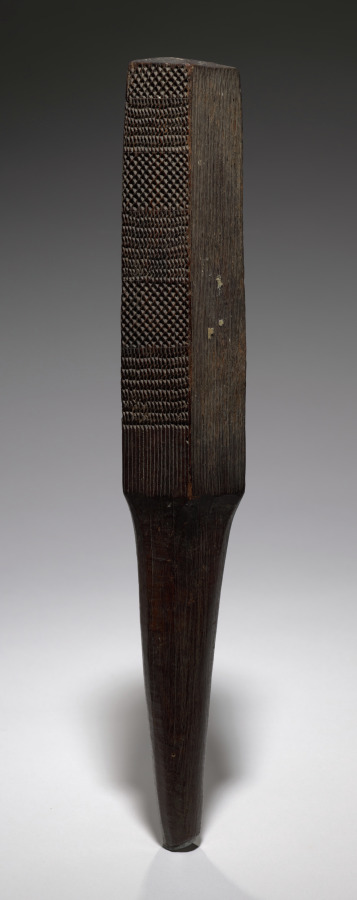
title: Tapa Cloth Beater (l'e kuku)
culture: Polynesia, Hawaii, 20th century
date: before 1930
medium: wood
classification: Sculpture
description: To make tapa, a decorated bark cloth, Hawaiian women used the four-sided beater to pound the inner bark of the paper mulberry tree, softened by a week of soaking in sea water. The cloth was beaten in several stages, starting with the most coarsely grooved side of the mallet and gradually reaching the finest grooved side. Although many Polynesian groups produced tapa cloth, only Hawaiian tapa cloth beaters were incised with a variety of "watermark" patterns. The prepared cloth was decorated with overlaying, cord snapping, free-hand painting, and printing techniques.